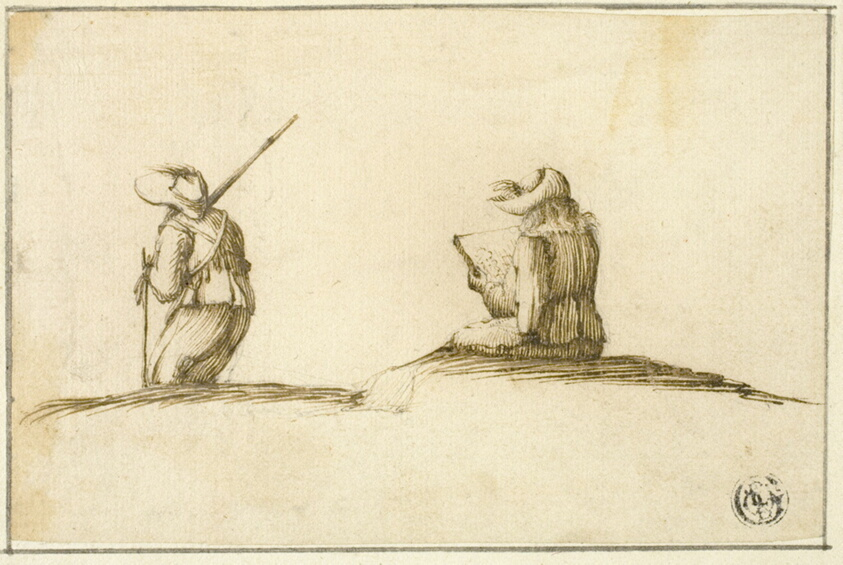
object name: Drawing and Watercolor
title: Artist Sketching, and Soldier, Both Seen from Back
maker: After Stefano della Bella; Italian, 1610-1664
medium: Pen and brown ink, over graphite, on buff laid paper, laid down on cream laid paper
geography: Italy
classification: pen and ink drawings; drawings (visual works); prints and drawing